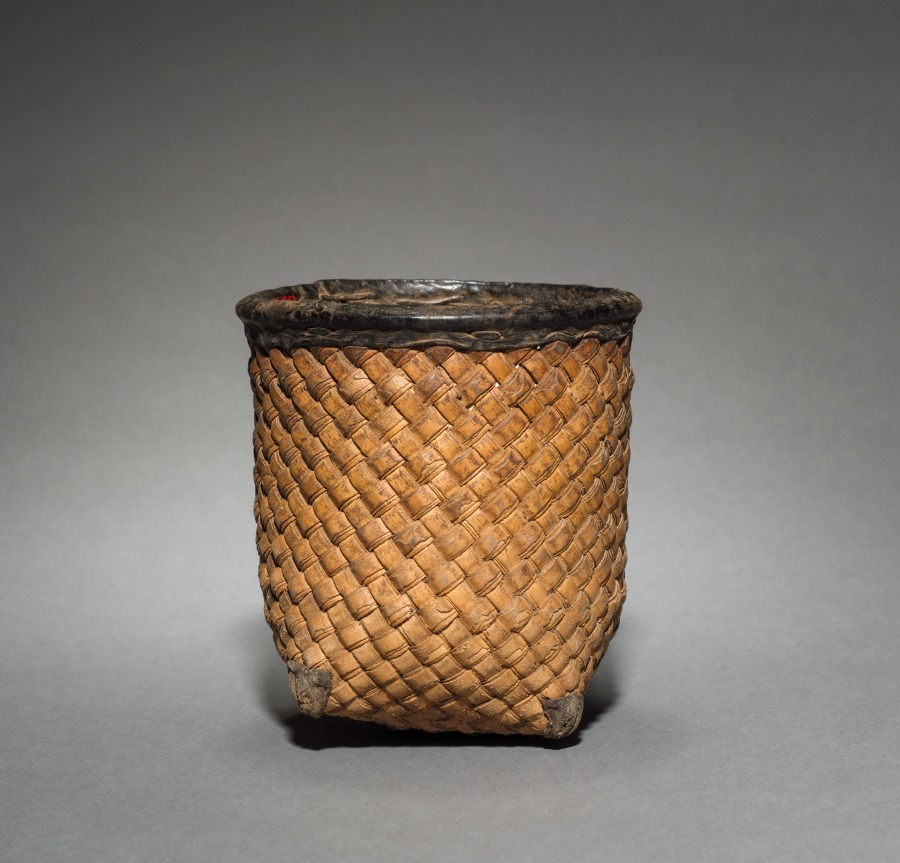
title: One of Ten Nesting Wedding Baskets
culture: Africa, Western Sudan, Burkina Faso, Lobi, 20th century (?)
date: c 1900s ?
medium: Plant fiber and leather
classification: Vessels